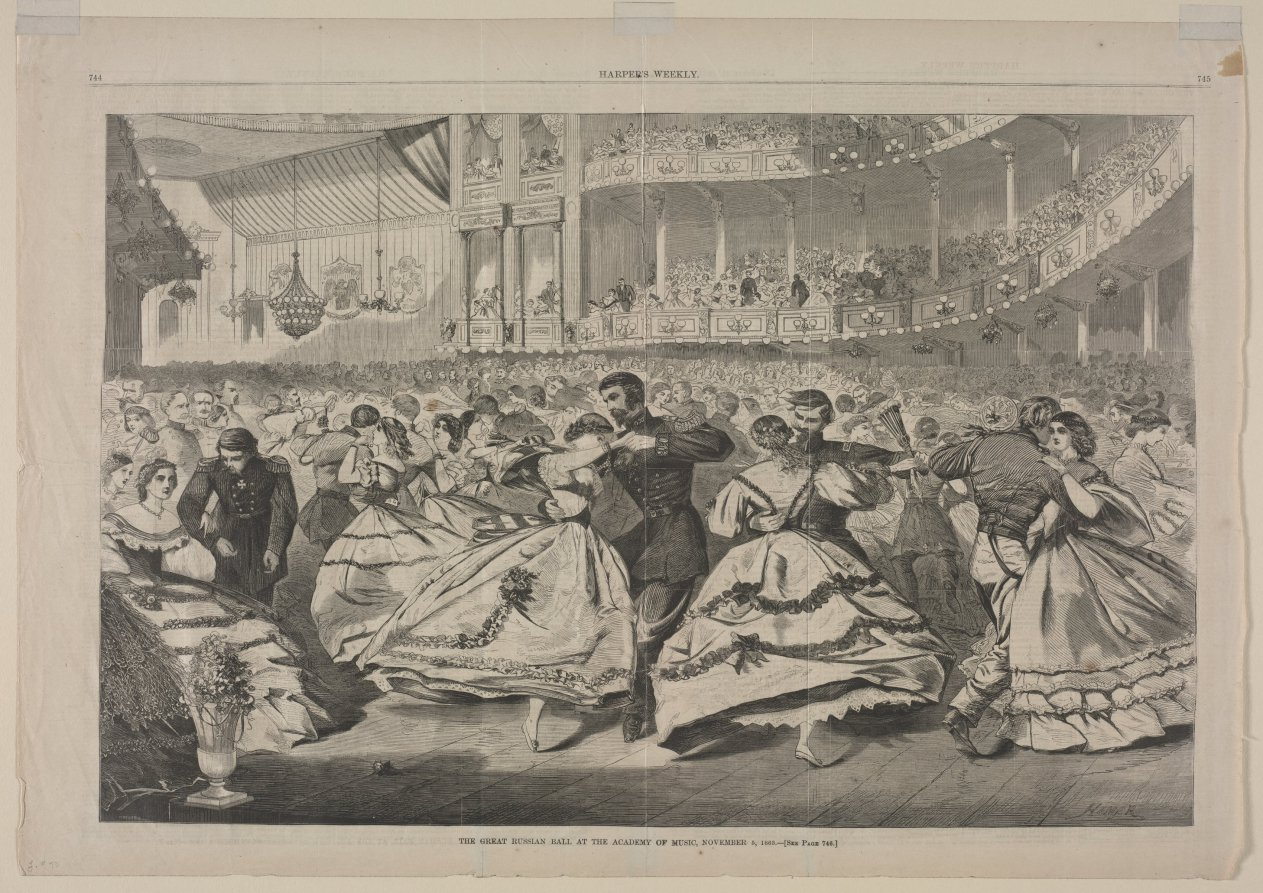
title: The Great Russian Ball at the Academy of Music, November 5, 1863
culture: America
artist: Winslow Homer (American, 1836–1910)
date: 1863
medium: wood engraving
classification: Print